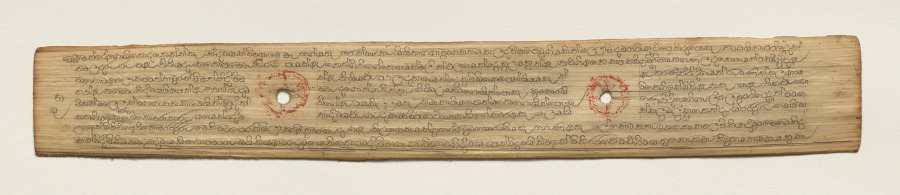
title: Leaf from a Buddhist Manuscript (recto)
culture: Sri Lanka, Singhalese, Late 17th century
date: c. 1700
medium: fiber paper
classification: Manuscript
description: Palm leaf material is still used for manuscripts in Sri Lanka. The palm leaves are prepared first by boiling them, drying them in the sun, and then rubbing them with oils. Scribes then use a metal stylus to incise the text. Then charcoal powder is wiped across the pages, filling in only the inscribed lines.